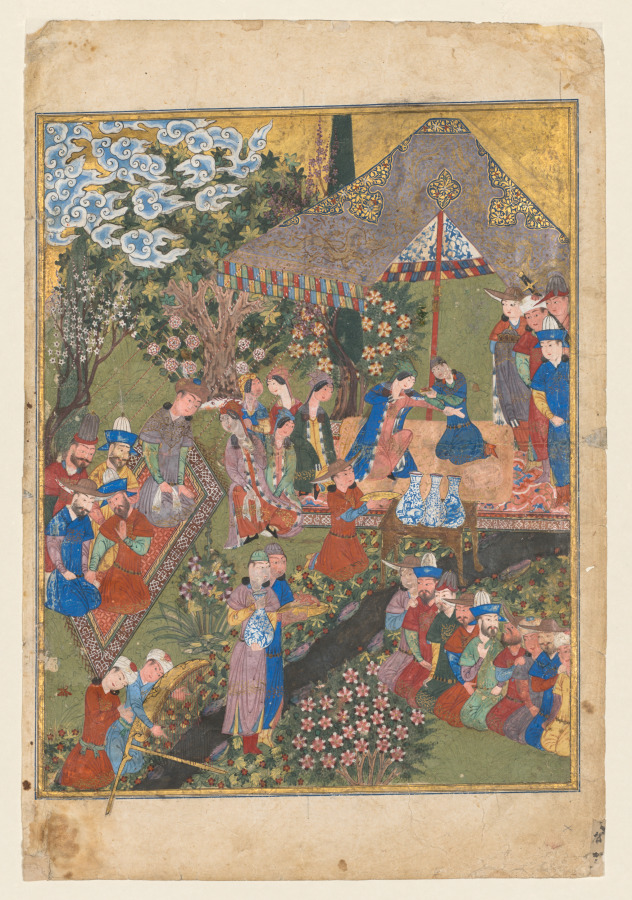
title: Royal Reception in a Landscape, right folio from the double frontispiece of a Shahnama (Book of Kings) of Firdausi (Persian, about 940–1019 or 1025) (verso)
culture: Iran, Shiraz, Timurid period (1370-1501)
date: 1444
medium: opaque watercolor, gold, and silver on paper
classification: Manuscript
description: The painting on the verso of this folio is the first half of a double-page frontispiece now detached from a Shah-nama manuscript (see CMA 1956.10 for the second half of the frontispiece). The scene does not illustrate a narrative from the Shah-nama, but is likely a representation of the courtly audience for whose entertainment the manuscript was created. The date and style of the painting indicate that it was made during the reign of the Timurid dynasty in Shiraz, Iran.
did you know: A musician plays a harp that has been mounted over a stream, painted with now tarnished silver paint.